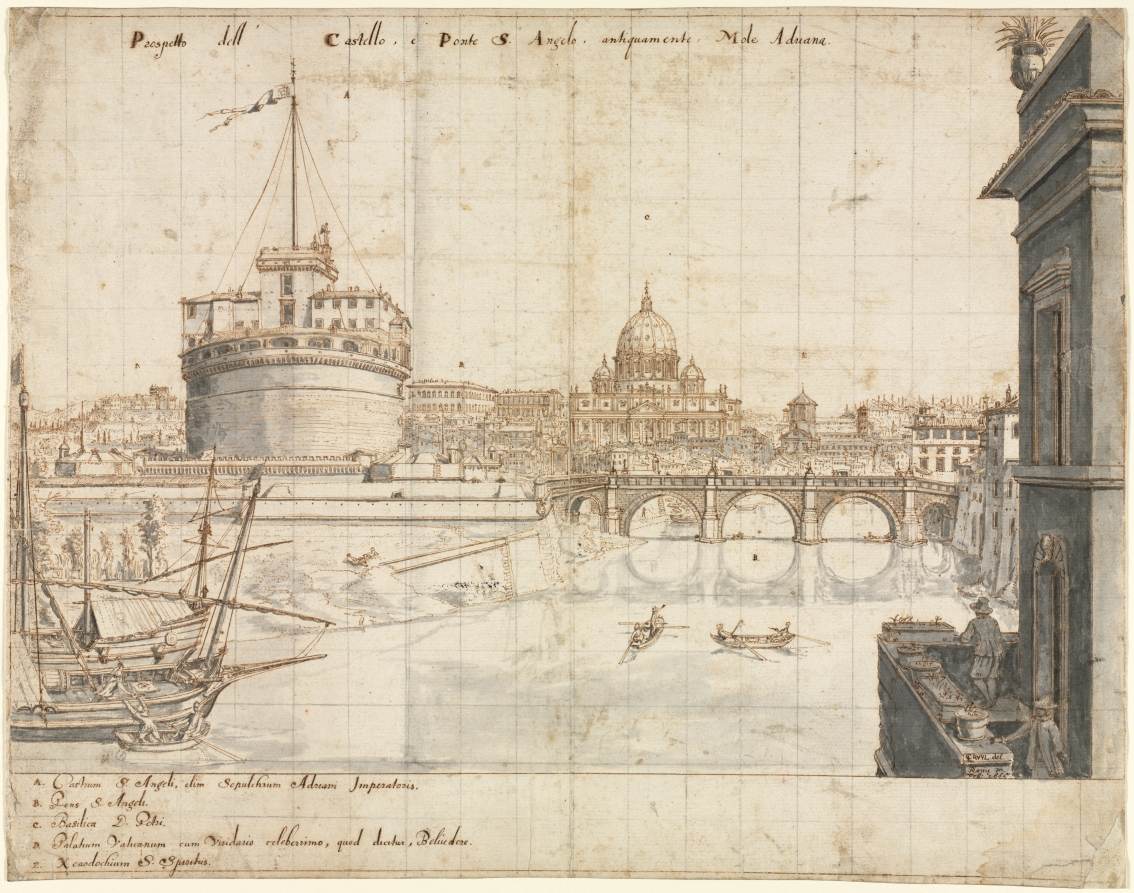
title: Eighteen Views of Rome: The Castel Sant'Angelo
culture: Flanders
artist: Lievin Cruyl (Flemish, c. 1640-c. 1720)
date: 1665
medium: pen and brown ink and brush and gray wash over graphite; squared in graphite; framing lines in brown ink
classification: Drawing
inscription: signed, lower right, in brown ink: [artist's monogram: LC] RVYL del. / Romæ mense / Feb: 1665. ; by artist, upper center, in brown ink: Prospetto dell' Castel, e Ponte S. Angelo, antiquamente, Mole Adriana ; by artist, throughout composition, in brown ink: [the letters A-E] ; by artist, lower left, in brown ink: A. Castrum S. Angeli, olim Sepulchrum Adriani Imperatoris. / B. Pons S. Angeli. / C. Basilica S. Petri. / D. Palatium Vaticanum cum Viridario celeberrimo, quod dicitur, Belvedere. / E. Xenodochum S. Spiritus. ; VERSO, upper left, in brown ink [illegible] [partially masked] ; ON STRIPS OF PAPER MOUNTED TO VERSO, lower center, in graphite: A20985 ; lower right, in graphite: E. 14